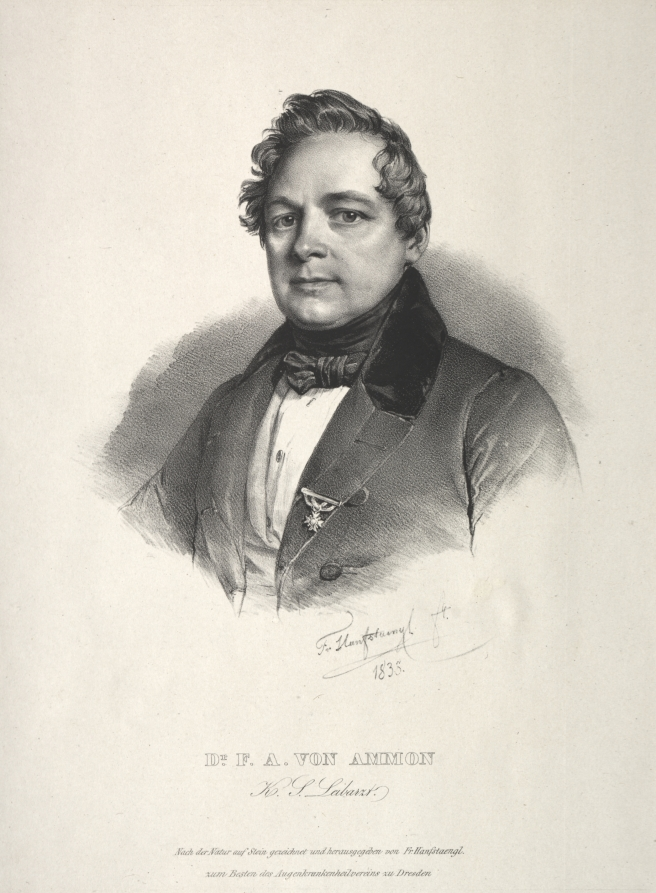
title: Dr. Friedrich August von Ammon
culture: Germany, 19th century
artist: Franz Seraph Hanfstaengl (German, 1804–1877)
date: 1838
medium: lithograph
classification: Print